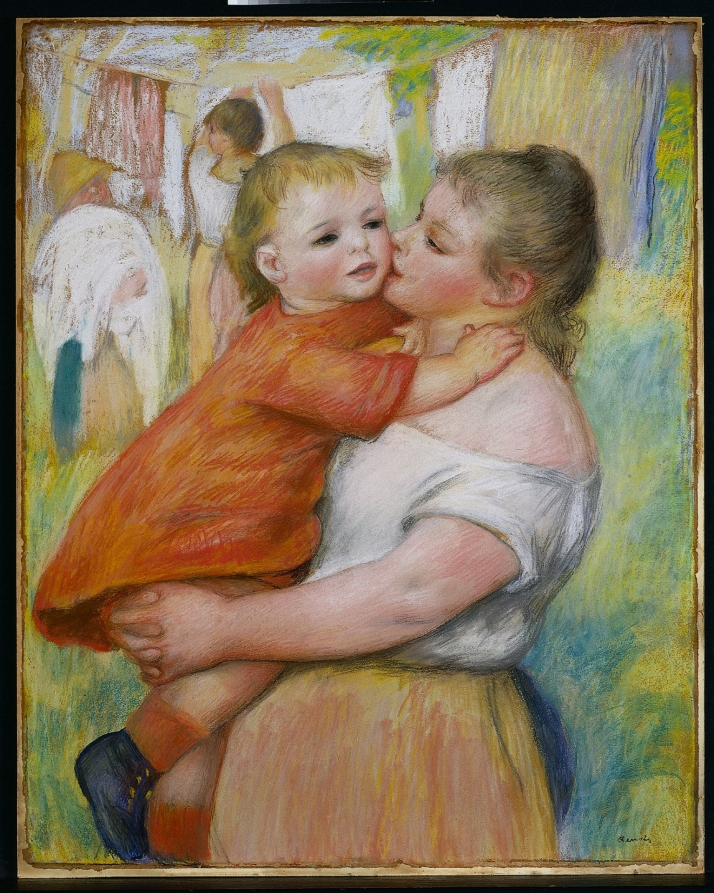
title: Laundress and Her Child (Aline and Pierre)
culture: France, 19th century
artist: Pierre-Auguste Renoir (French, 1841–1919)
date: c. 1886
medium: pastel on brown paper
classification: Drawing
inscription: stamped, lower right, in black ink: Renoir [Lugt 2137b]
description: In this idealization of motherhood and rural life, Auguste Renoir depicted his future wife, Aline Charigot, with their son Pierre. Bright colors, including warm orange and yellow, are contrasted with cool blues and greens to create a dramatic impact. Renoir took full advantage of pastel’s unique optical properties, in which minute, irregular particles diffusely reflect light, allowing for an unparalleled velvety brilliance that is perfectly suited to portray the youthful bloom of the woman and child.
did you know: Auguste Renoir also realized this composition as a painting in oil on canvas which is in the collection of the Barnes Foundation today.